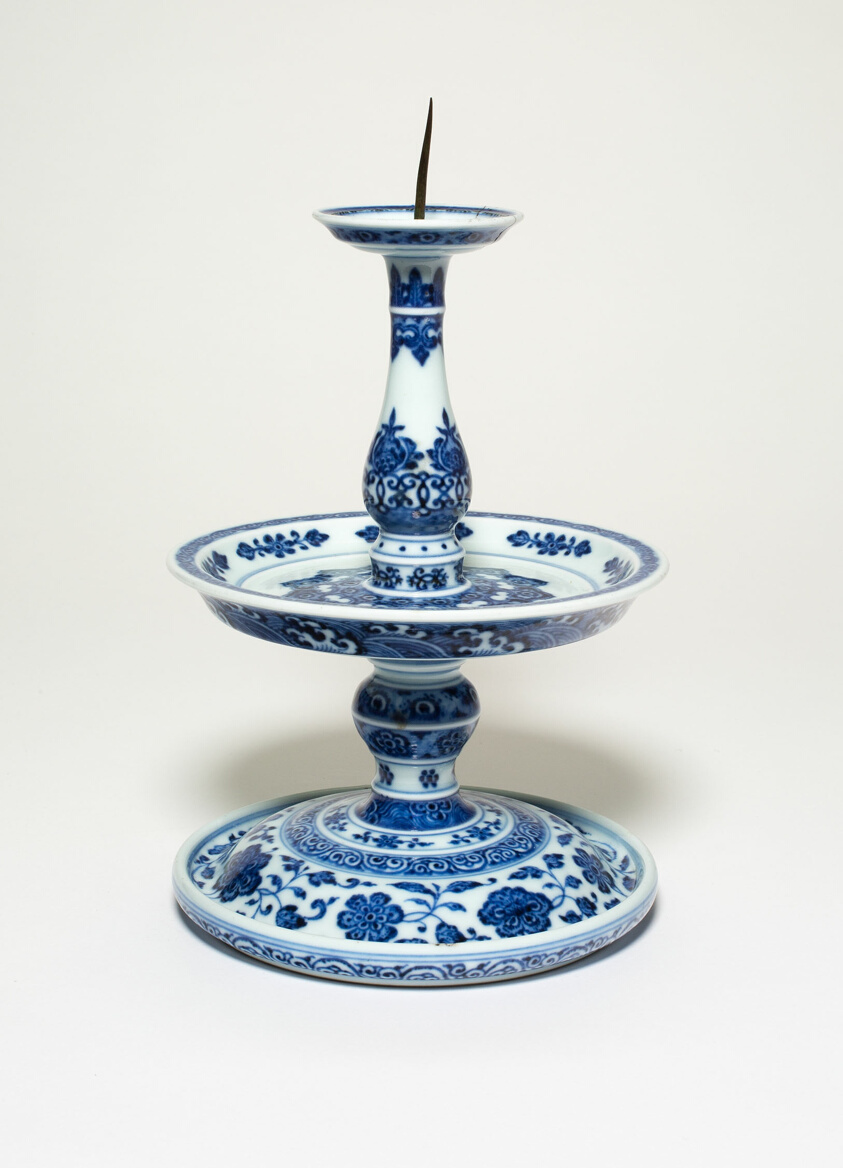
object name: Decorative Arts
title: Pricket Candlestick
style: Chinese (culture or style)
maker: China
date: Qing dynasty (1644–1911), Qianlong reign mark (1736–1795), 18th/19th century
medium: Porcelain painted in underglaze blue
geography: China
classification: candleholder - candlestick; candleholder; porcelain; ceramics; asian art; decorative arts